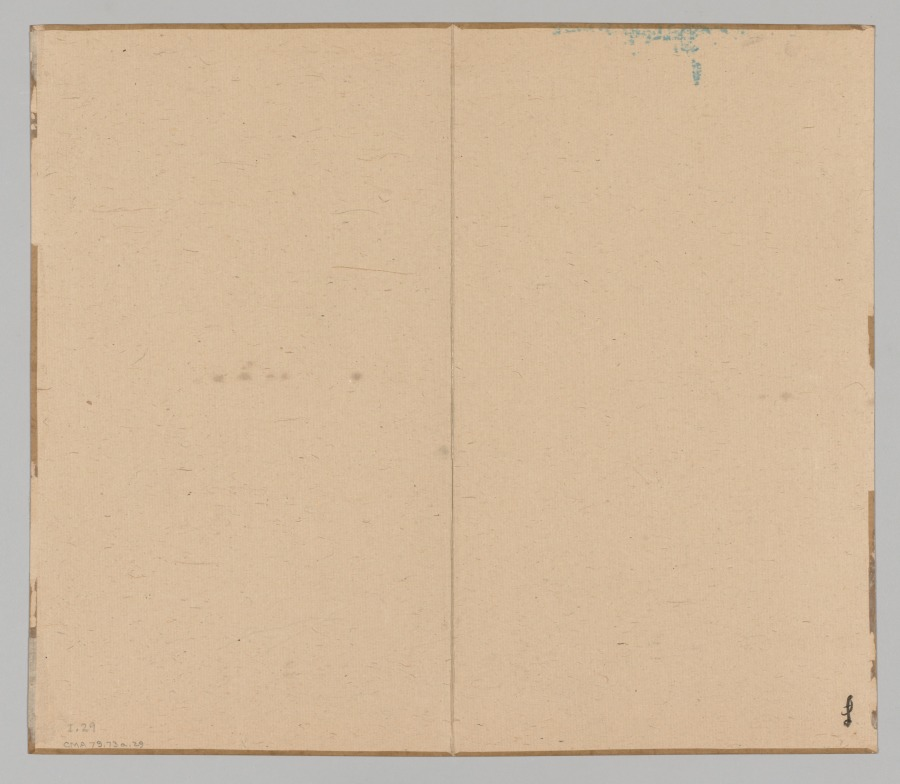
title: Reverberations of Taiga, Volume 1 (leaf 29)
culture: Japan, Edo period (1615–1868)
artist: Aoki Shukuya (Japanese, d. 1802)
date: mid- to late 1700s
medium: double-leaf from a pair of albums; ink and light color on paper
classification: Portfolio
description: Traditionally, young painters in Japan began their studies with an established master-painter. The master's compositions invariably became models that the apprentice copied to learn various ink and brush techniques. Shukuya was a pupil of the famous Kyoto artist Ikeno Taiga, whose style is reflected in these sketches of rocks, trees, and mountains.